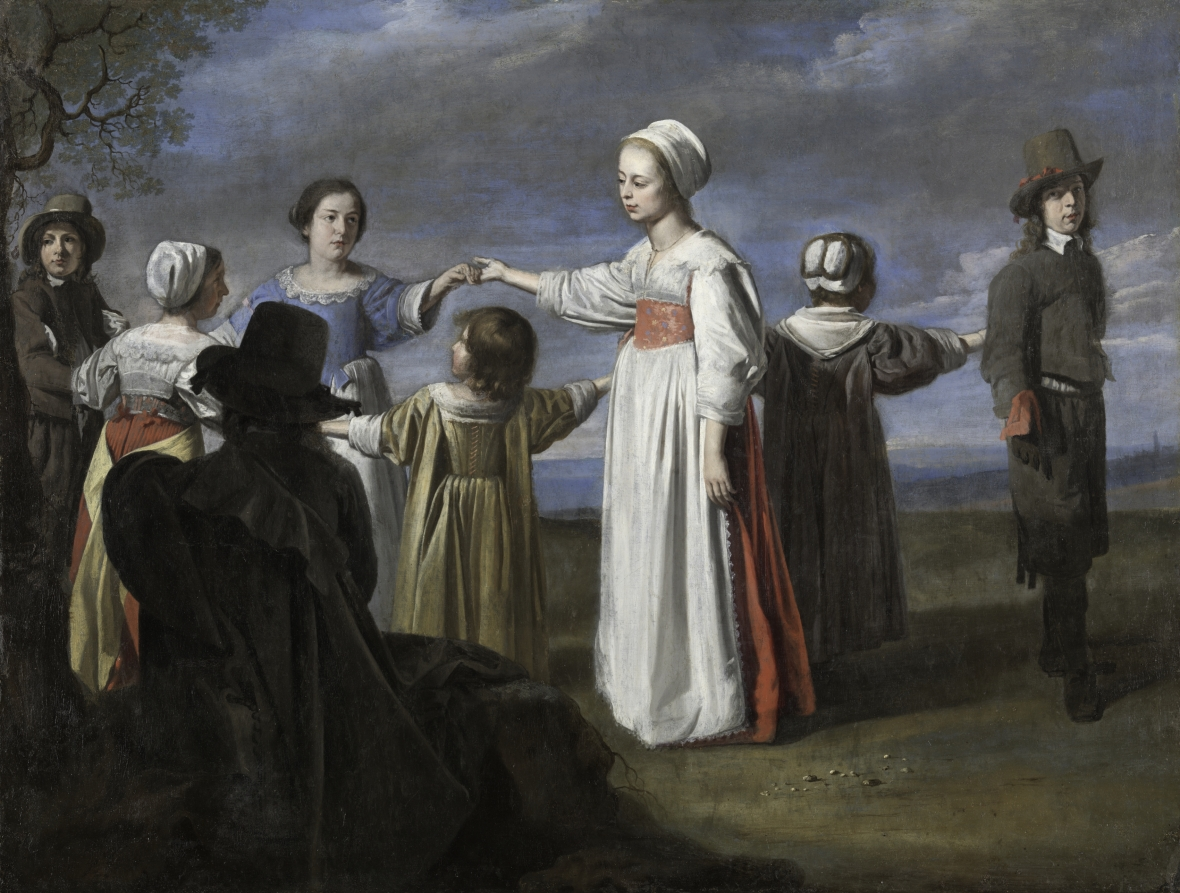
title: Children Dancing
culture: France, 17th century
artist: circle of Le Nain (French)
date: c. 1650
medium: oil on canvas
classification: Painting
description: Antoine, Louis, and Mathieu Le Nain were brothers who ran a collective studio in Paris from around 1630 until 1648, when Antoine and Louis died. Mathieu continued to produce work under their name "Le Nain" throughout the 1650s. Of the museum's four paintings that have been called "Le Nain" (1958.174, 1958.175.1, 1958.175.2), this work has held its attribution to Mathieu the longest. With his back to the viewer, a musician sits in shadow while a group of children pose patiently in a chain-like formation, awaiting the start of their dance. Because of its reliance on order and collaboration, dancing symbolized familial harmony. The attention to the individuality of the children suggest a family portrait, while their wistful expressions and melancholic tone have led to the hypothesis that the children are portraits-both living and posthumous. The description of the intricate lace and the wearied expressions of the slim boys is characteristic of Mathieu's handling. However, the canvas has been attributed to one of Mathieu's followers, the Master of the Games, because of the static, brightly lit figures whose elongated shadows don't quite describe their forms.